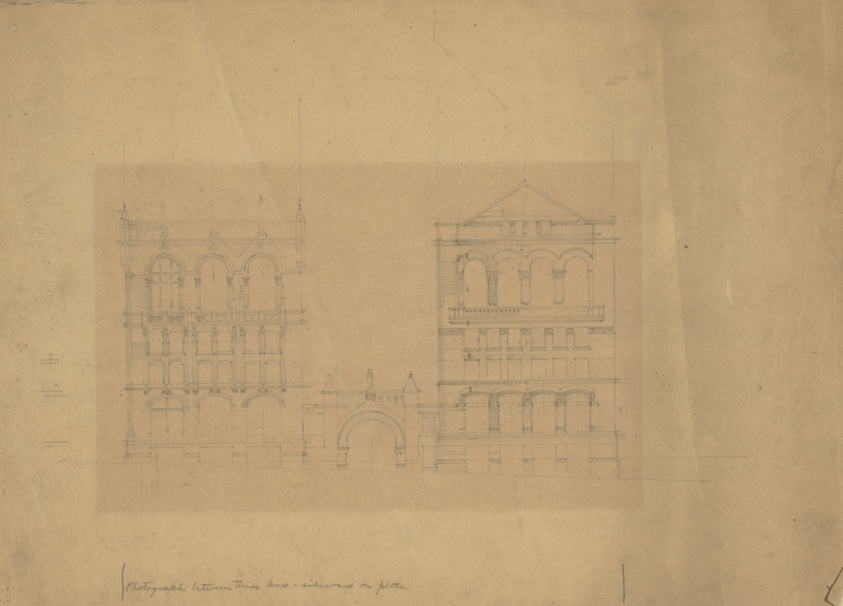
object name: Architectural Drawing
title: Board of Trade Building, Kansas City, Missouri, Front Elevation Study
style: 19th century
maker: Burnham & Root; American, 1873–1891; John Wellborn Root; American, 1850–1891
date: c. 1887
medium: Graphite on tan drawing paper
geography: Kansas City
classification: architectural drawing; design drawing; architecture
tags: Missouri, architecture, office buildings